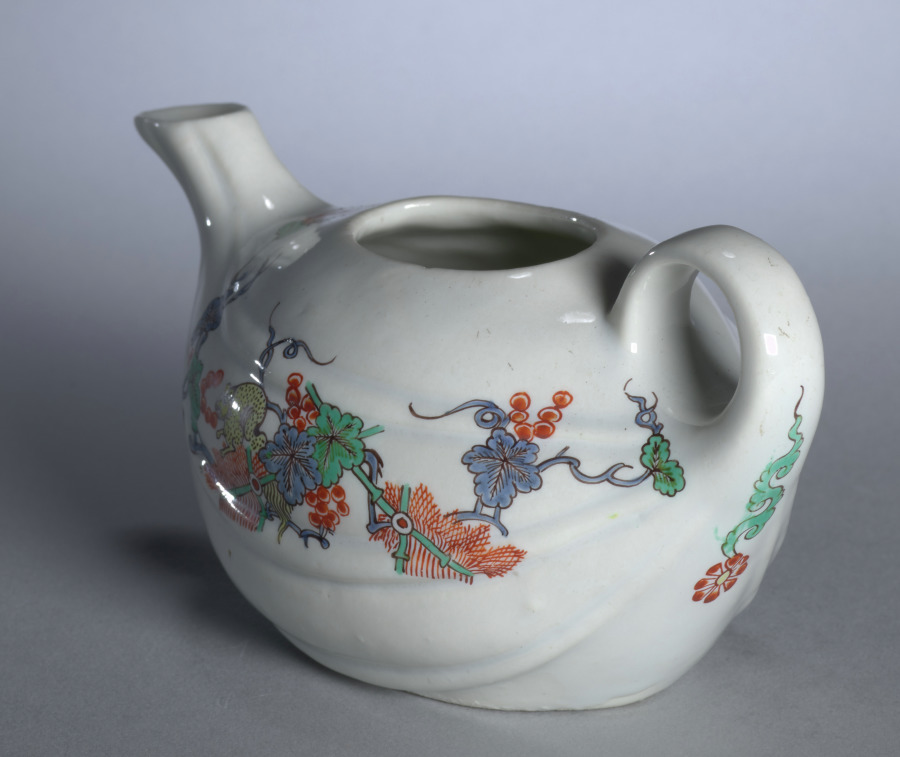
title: Teapot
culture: France, Chantilly, 18th century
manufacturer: Chantilly Porcelain Factory (French)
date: c. 1730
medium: soft-paste porcelain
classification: Ceramic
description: The pieces composing this individual tea set are entirely typical of Chantilly soft-paste porcelain in the Kakiemon style. Both the form and decoration of these pieces were inspired by Japanese prototypes. The use of knobs in the form of trumpet-shaped blossoms is characteristic of Chantilly wares.